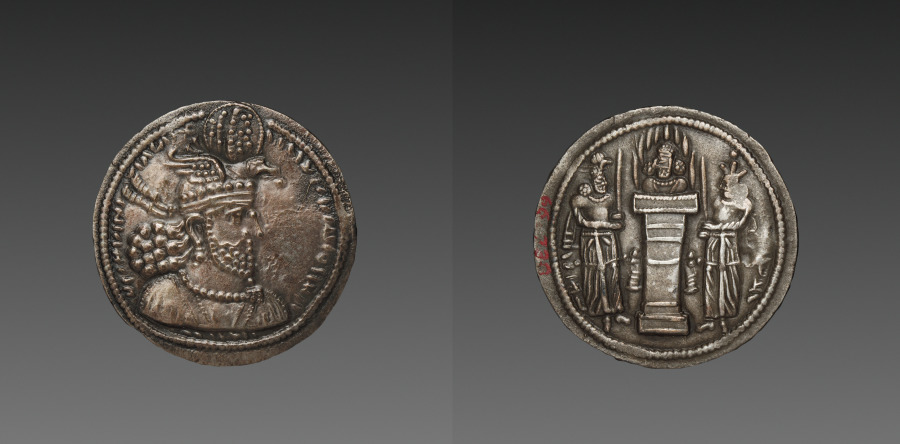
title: Drachm: Bust of Hormizd II (obverse); Fire altar with bust (reverse)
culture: Iran, (minted), Sasanian Empire (224–651 CE), reign of Hormizd II (303–309)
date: 303–9 CE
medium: silver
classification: Coins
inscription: 𐭬𐭦𐭪𐭠𐭠𐭭𐭬𐭫𐭪𐭠𐭠𐭩𐭫𐭠𐭭𐭬𐭭𐭪𐭲𐭥𐭬𐭭𐭩𐭦𐭣𐭠𐭭 𐭬𐭦𐭣𐭩𐭮𐭭𐭡𐭢𐭡𐭥𐭧𐭬𐭦𐭣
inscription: 𐭠𐭲𐭥𐭫𐭦𐭩𐭠𐭥𐭧𐭬𐭦𐭣